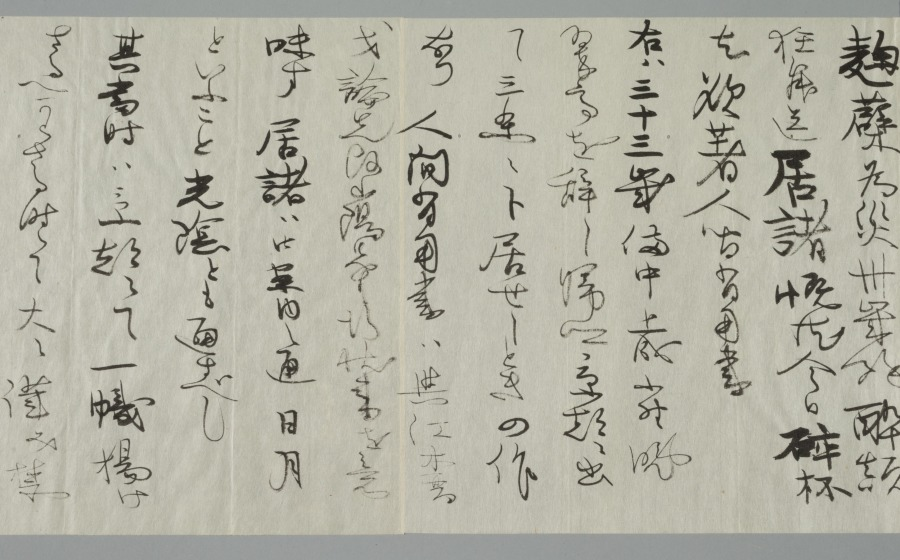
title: Courtesan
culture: Japan, Edo period (1615–1868)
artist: Matsuno Chikanobu (Japanese, active 1716–35)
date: 1716–35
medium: hanging scroll; ink and color on paper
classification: Painting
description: A glamorous courtesan sports an outer robe decorated with large roundels featuring plant motifs including iris and bush clover. Little is known about the life and artistic training of the painter Matsuno Chikanobu, an ukiyo-e artist who painted in a style strongly reminiscent of that of the Kaigetsudō studio. Many of his known paintings are on silk, and executed with high quality pigments, indicating that his primary clientele were wealthy individuals.